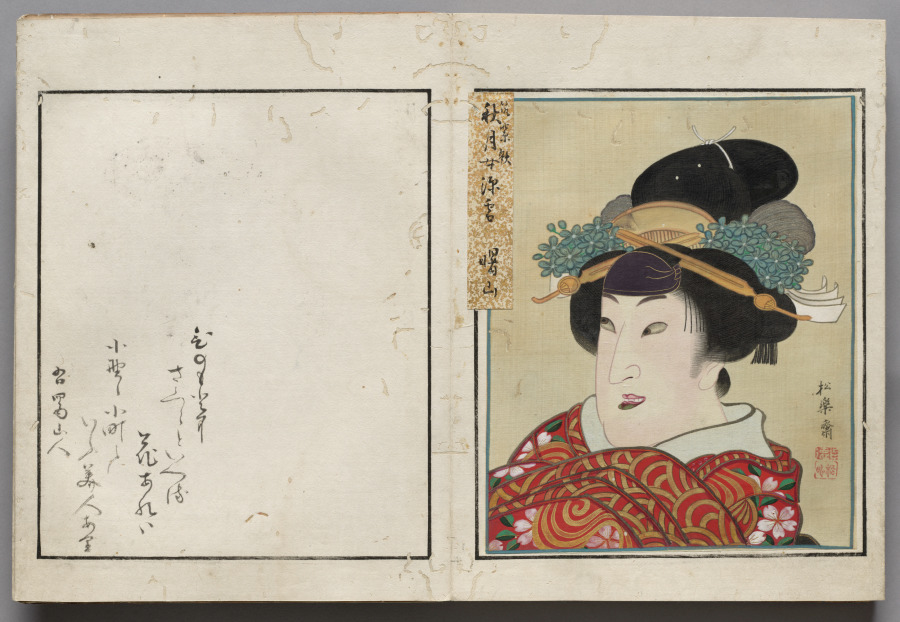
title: Double-Leaf from Album of Actor Portraits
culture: Japan, Edo period (1615–1868)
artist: Shōrakusai (Japanese)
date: c. 1790–1810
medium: double-leaf from an accordion-style album; ink and color on silk (right), and ink on paper (left)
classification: Bound Volume